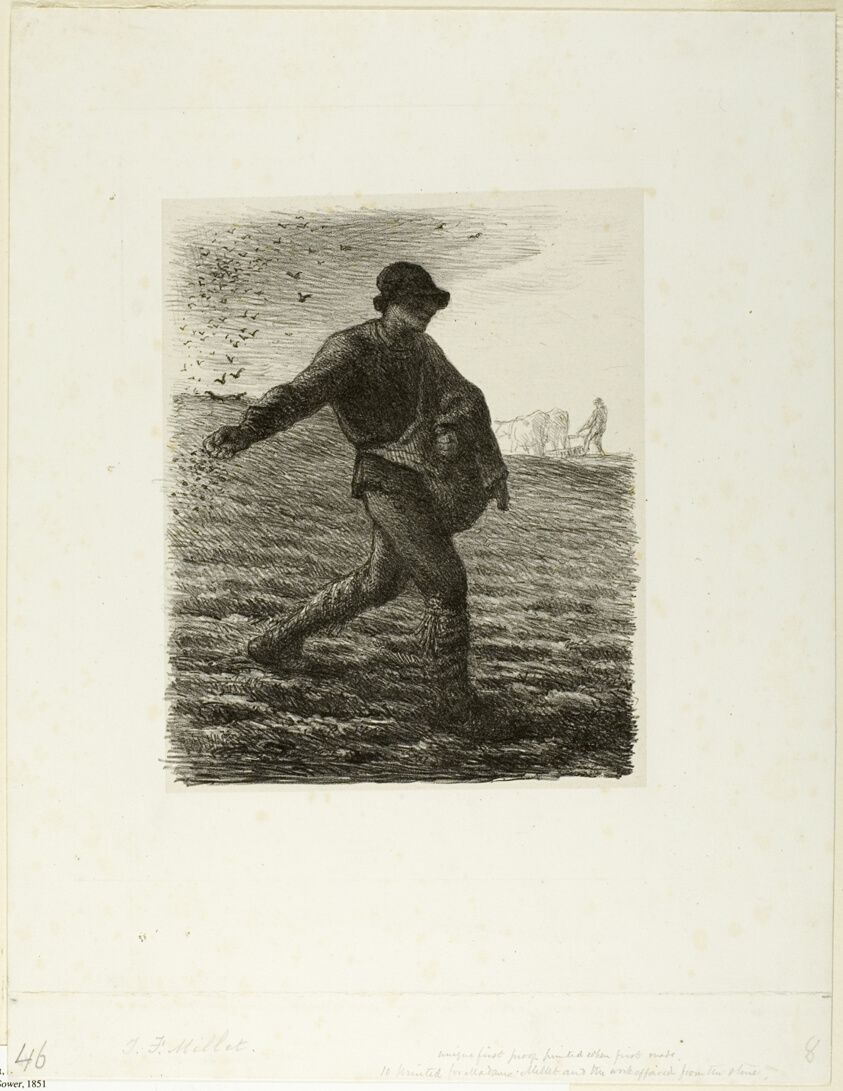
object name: Print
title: The Sower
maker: Jean François Millet (French, 1814-1875)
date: 1851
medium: Lithograph with scraping on stone on ivory China paper laid down on white wove paper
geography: France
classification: lithograph; print; prints and drawing